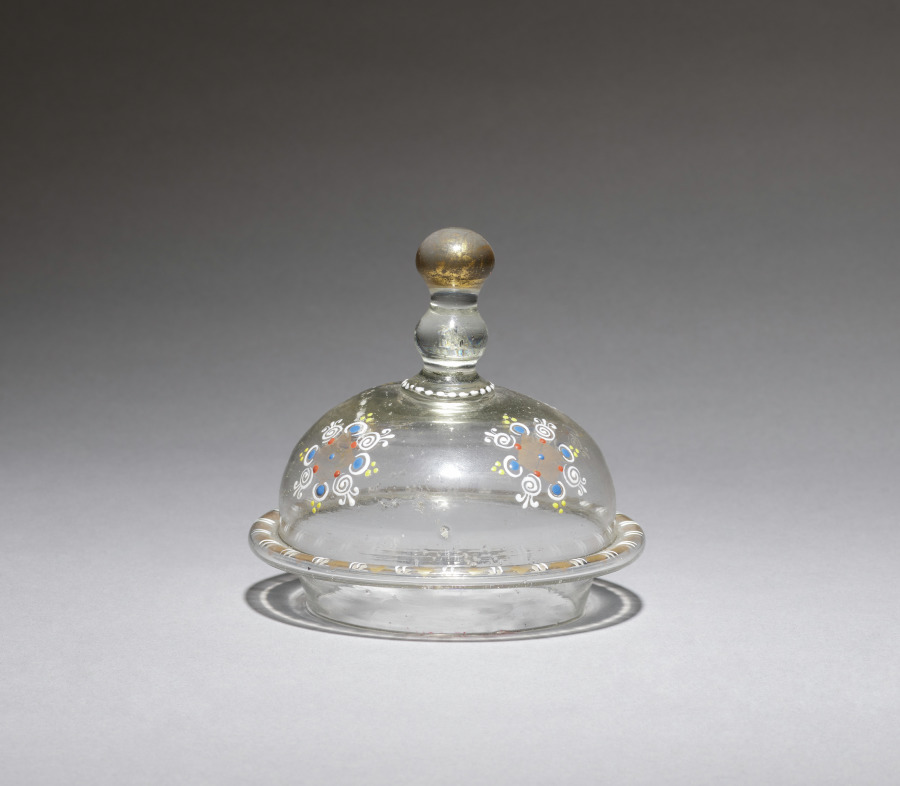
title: Cover for a Beaker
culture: Germany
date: 1693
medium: enameled glass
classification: Glass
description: This humpen was made for the court cellar (Hofkellerei), Dresden, which belonged to the House of Saxony, showing the arms of Johann IV zu Sachsen.